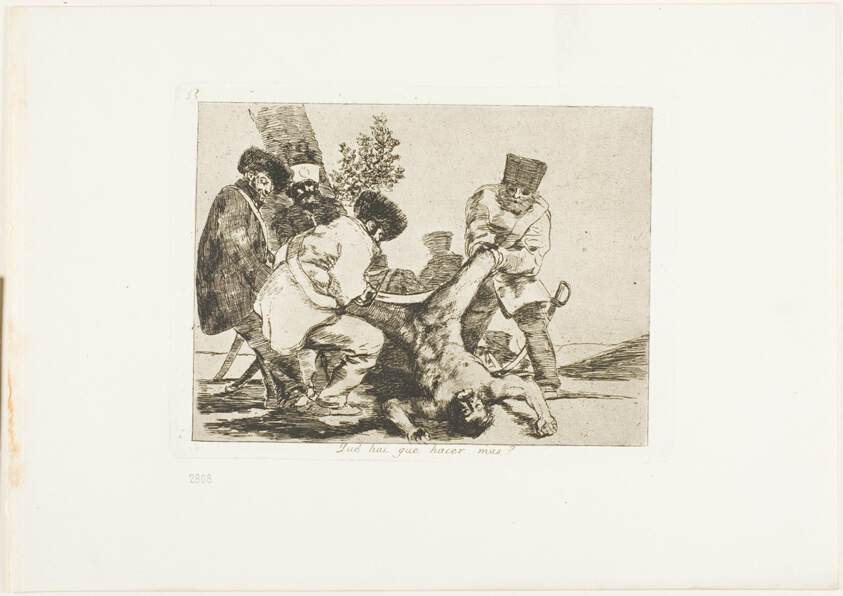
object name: Print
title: What More Can Be Done?, plate 33 from The Disasters of War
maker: Francisco José de Goya y Lucientes (Spanish, 1746-1828)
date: 1812/15, published 1863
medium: Etching, lavis, drypoint, burin and burnishing on ivory wove paper with gilt edges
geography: Spain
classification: etching; print; prints and drawing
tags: war